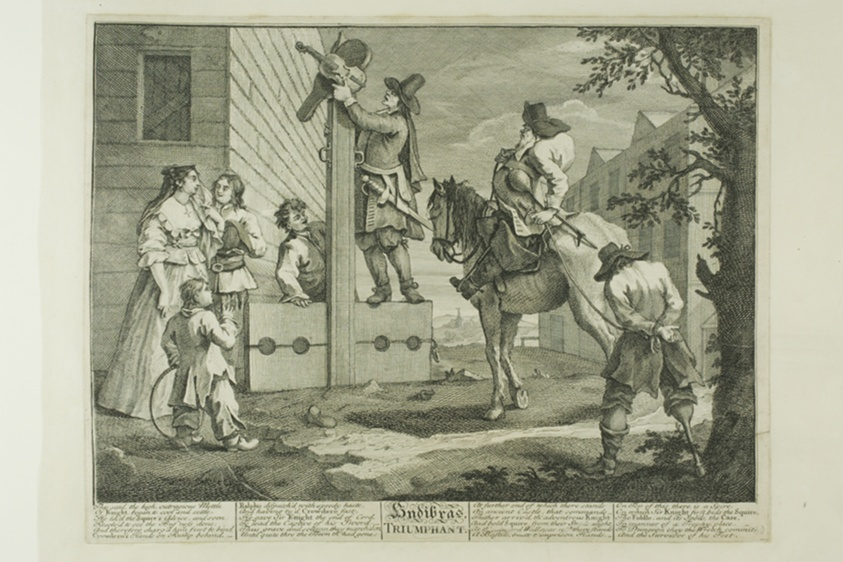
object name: Print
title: Hudibras Triumphant, plate four from Hudibras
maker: William Hogarth (English, 1697-1764)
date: February 1725/26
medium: Etching and engraving in black on cream paper edge mounted on cream wove paper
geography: England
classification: engraving; prints and drawing; print; etching